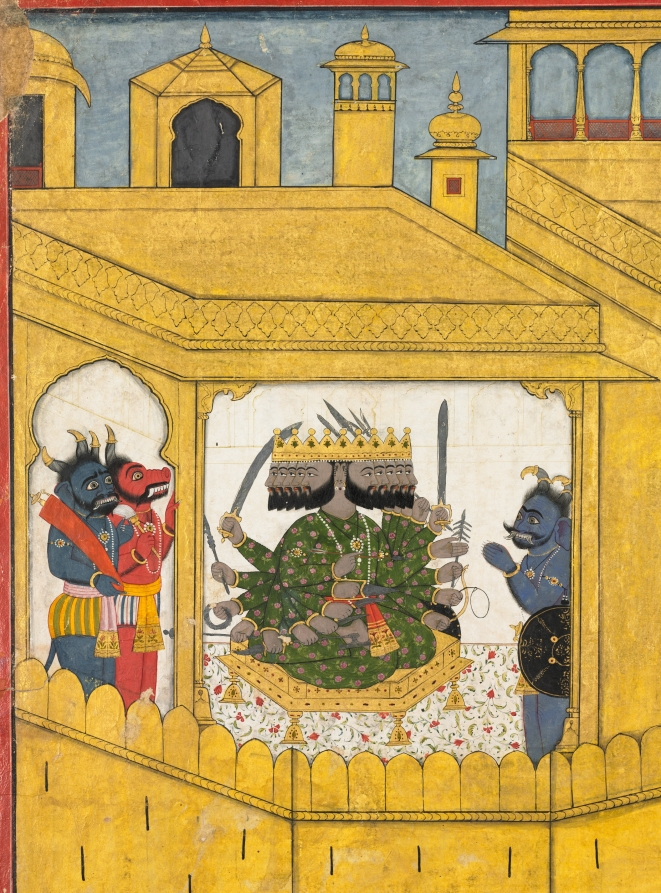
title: Ravana addresses Sita in the garden of Lanka, from Chapters 53 and 54 of the Aranya Kanda (Book of the Forest) of a Ramayana (Rama’s Journey)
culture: Northern India, Pahari kingdoms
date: c. 1725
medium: Gum tempera, gold, and silver on paper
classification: Painting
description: The viewer is cut off from Lanka by the surrounding sea and the city’s golden walls in this expansive composition probably intended for courtly display This choice of perspective cleverly emphasizes the captivity of the Sita, faithful wife of the hero Rama. She kneels beneath an ashoka tree, guarded by demonesses. The princess’s abductor, the 10-headed and 20-armed demon lord of Lanka, Ravana, appears twice in the image. In the palace, he consults his council of minions. At the right, he hears Sita’s refusal to marry him. Ravana neither harms her, nor sets her free.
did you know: Ravana’s wives take the forms of beautiful women and fearsome demonesses.